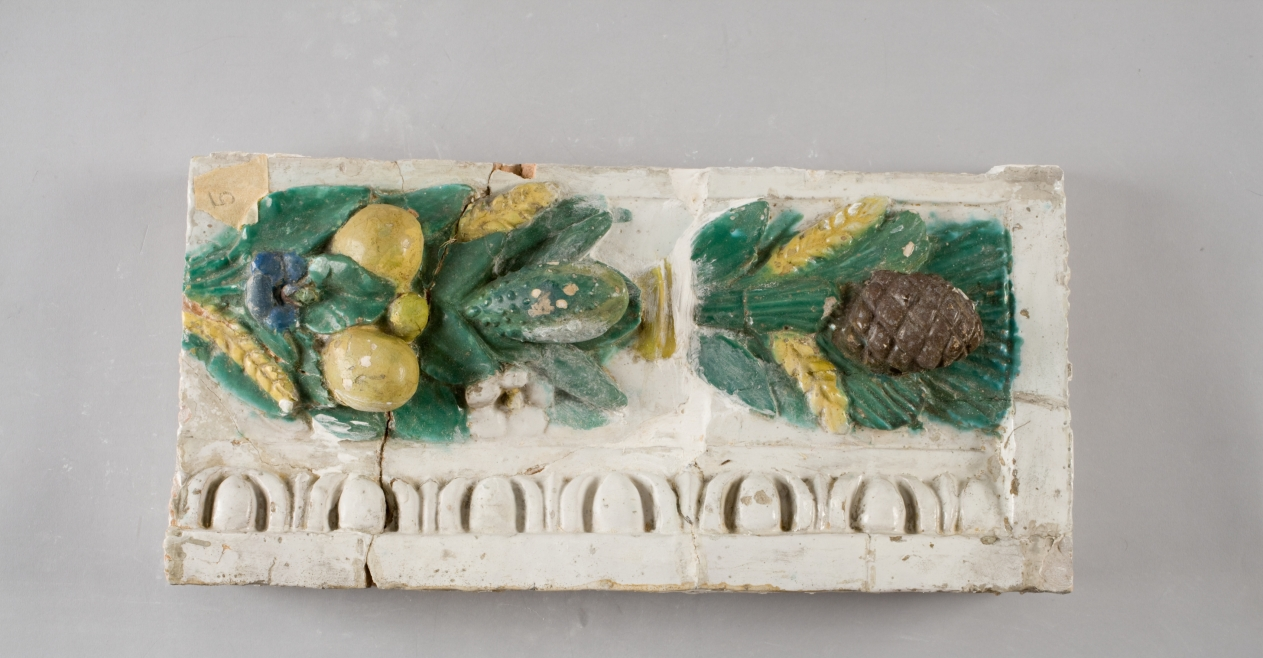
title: Fragment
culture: Italy, Florence, 16th century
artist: Benedetto Buglioni (Italian, 1461–1521)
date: c. 1900–1910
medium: glazed terracotta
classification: Sculpture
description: The Madonna sits upon a throne with the Christ Child standing on her knee. He is steadied by his mother, turning delicately to grasp the Virgin's robe for support. On the left is St. Francis, identified by his stigmata. On the right, St. Anthony Abbot is identified by his monk's robe and T-shaped walking stick. The brown robes of the saints, the purple of the Virgin's tunic (a shade characteristic of the artist), and the flesh tones of the figures contrast strongly against the bright blue background. In the semicircular sky behind the figures, three winged cherub heads emerge, representing a host of angels. The inclusion of St. Francis in this altarpiece honors the saint, suggesting that the altarpiece may have been originally built into the wall of a Franciscan institution in Tuscany. Two shields bearing the Borgherini family crest appear in the lower portion of the altarpiece's border, further suggesting that the chapel for which this altarpiece was made was likely owned or endowed by the family. Glazed terracotta is both durable and decorative and the gleaming white of this piece would have stood out in the darkness of a church. The medium was made popular by Renaissance artist Luca della Robbia and came into fashion as a substitute for expensive carved marble. A rounded arch frame embellished with fruit and flower garlands as well as egg-and-dart and cord moldings accompanied the work when it was acquired, but was later determined not to be original and removed. Buglioni's work bears the influence of the della Robbias, particularly in the simple color scheme. Buglioni likely worked in the studio of Luca's nephew, Andrea, where he would have learned the technique of glazing terracotta.